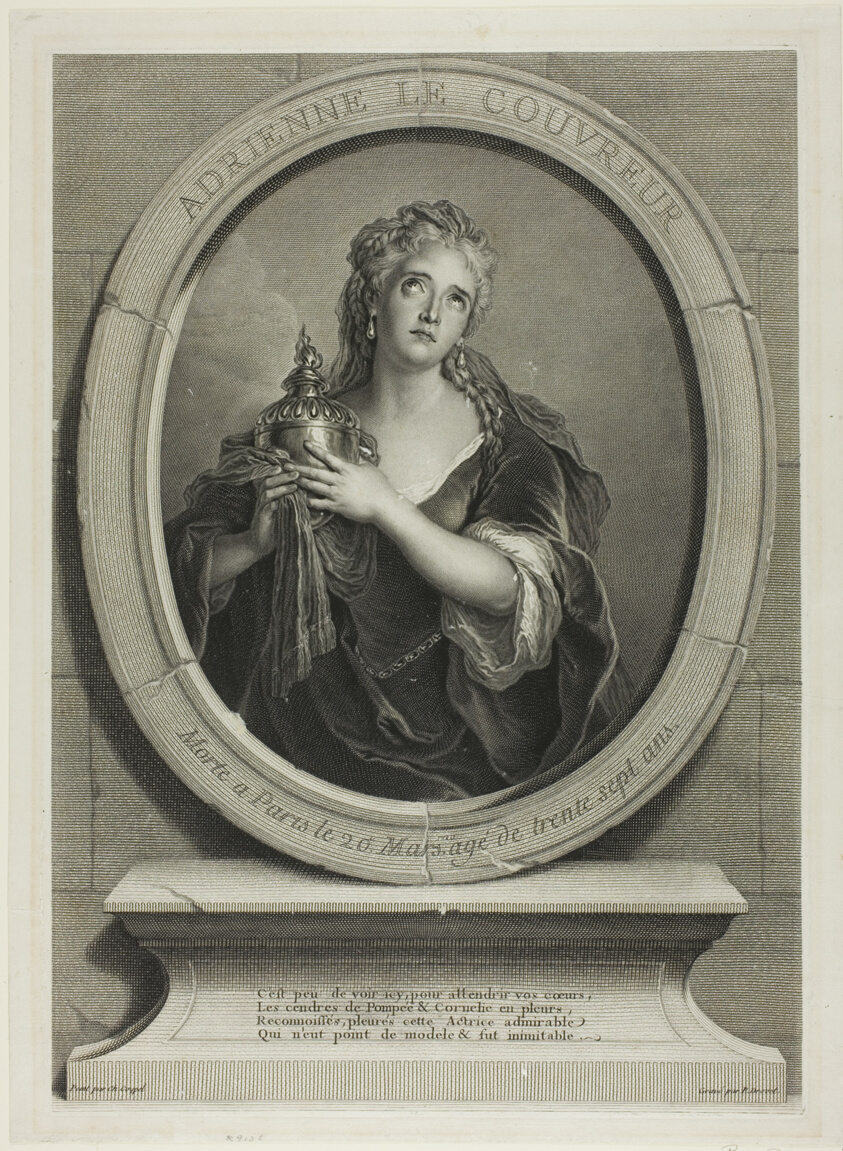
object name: Print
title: Portrait of Adrienne Le Couvreur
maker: Pierre-Imbert Drevet (French, 1697-1739); after Charles-Antoine Coypel (French, 1694-1752)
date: 1730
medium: Engraving on ivory laid paper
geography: France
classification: engraving; print; prints and drawing